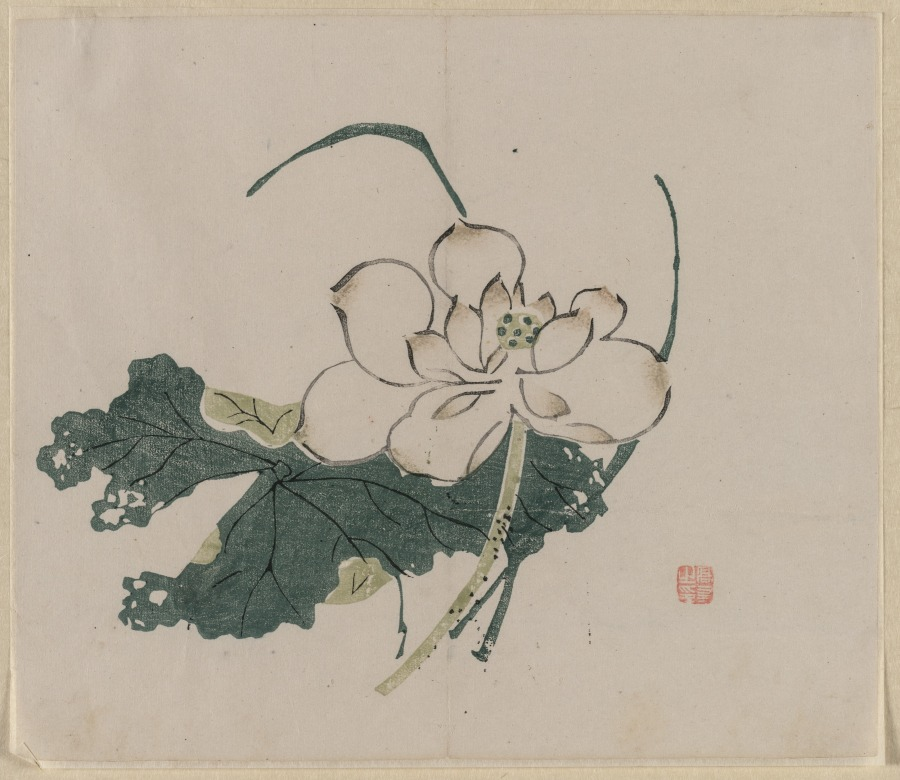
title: Lotus Blossom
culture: China, Ming dynasty (1368-1644) or later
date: 1368–1644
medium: color woodblock print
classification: Print